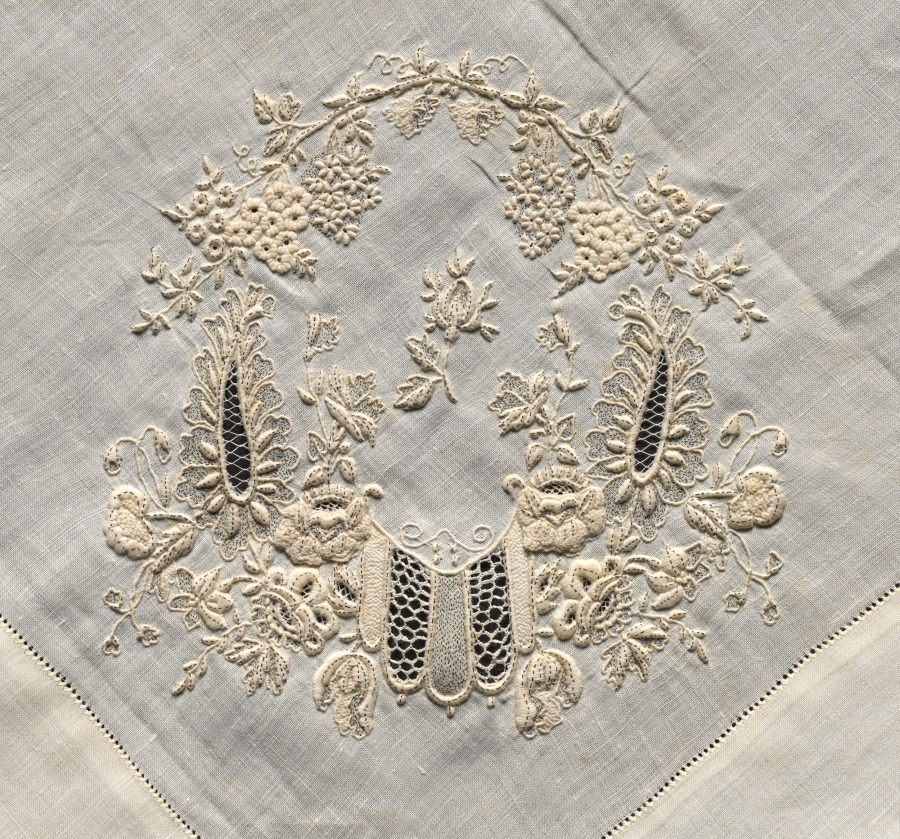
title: Embroidered Handkerchief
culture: Spain, Teneriffe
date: 1800s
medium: Plain weave linen: embroidered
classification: Embroidery